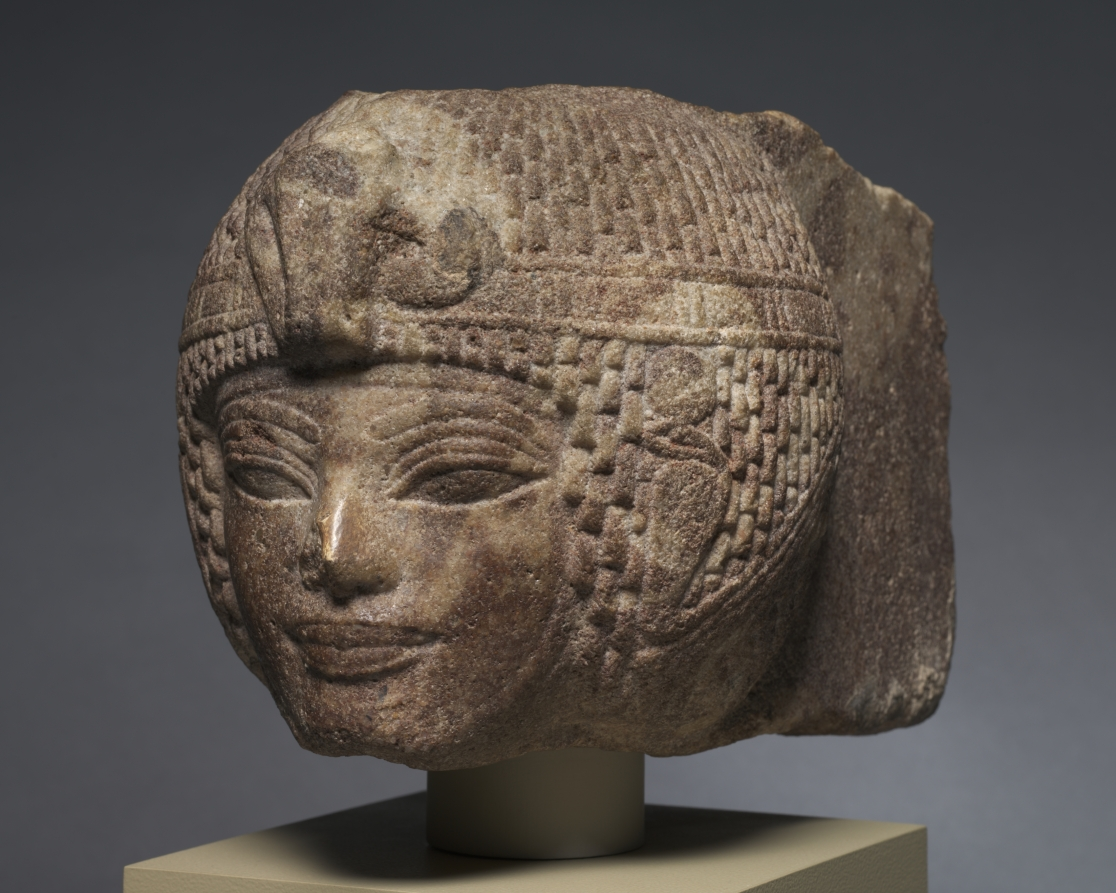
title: Head of Amenhotep III Wearing the Round Wig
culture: Egypt, New Kingdom (1540–1069 BCE), Dynasty 18, reign of Amenhotep III (1390–1352 BCE)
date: c. 1391–1353 BCE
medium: brown quartzite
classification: Sculpture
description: Although he must have been nearly 50 years old when this portrait was carved, Amenhotep III appears more youthful than ever. Over a round, curly wig he wears a diadem with side streamers adorned with cobras bearing sun disks on their heads. The stone quartzite was associated with the sun on account of its ruddy hues, ranging in color from brown to red to purple. It was a favorite of Amenhotep III, the king who called himself the "dazzling sun-disk of all lands."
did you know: Amenhotep wears a chin strap that would have held up a false beard.